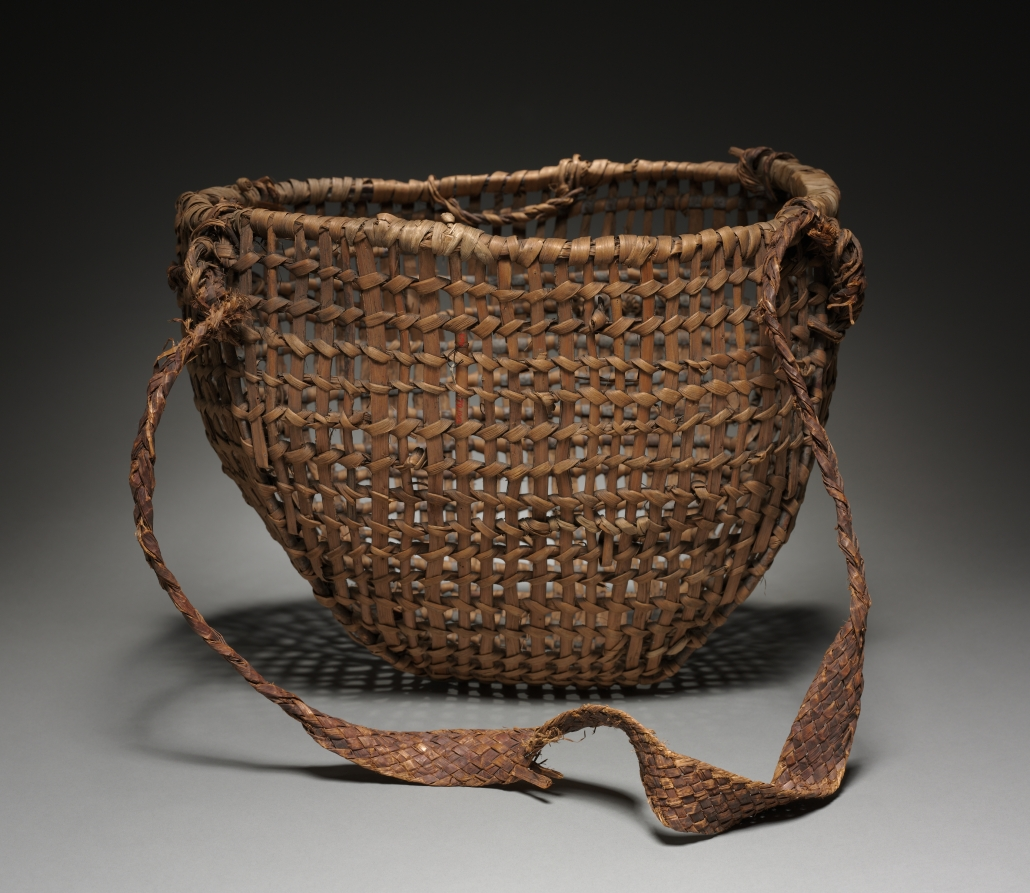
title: Clam basket with Tump Line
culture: Northwest Coast, Klallam, late 19th century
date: late 1800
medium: Cedar root; openwork, braided, plaited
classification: Basketry